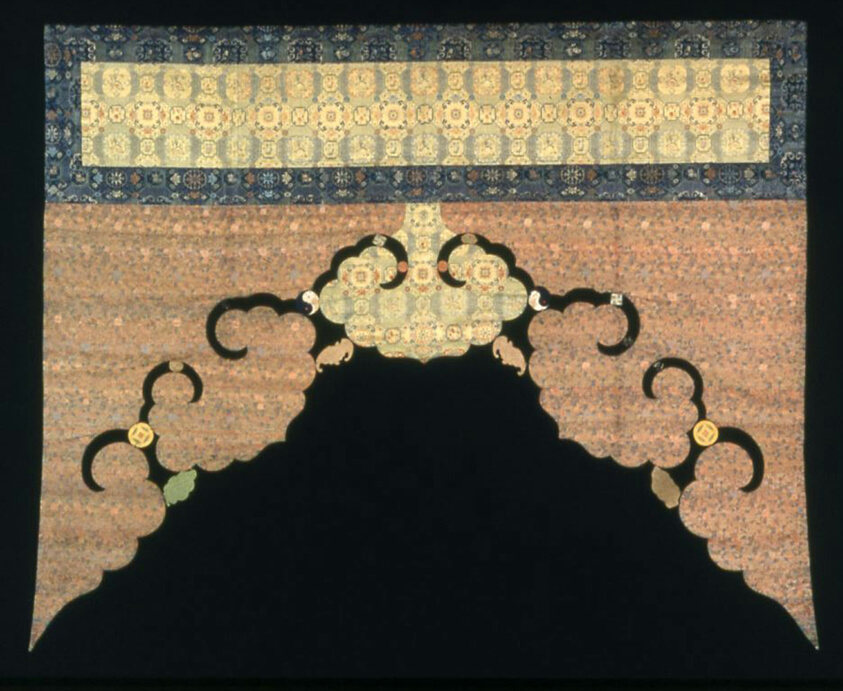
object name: Textile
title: Valance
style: qing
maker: China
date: Qing dynasty (1644–1911), 1750/1850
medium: Silk and gold-leaf-over-lacquered-paper strips, warp-float faced 4:1 satin weave with weft-float faced 1:2 'S' twill interlacings of secondary binding warps, supplementary patterning wefts and self-patterning ground wefts; silk, warp-float faced 5:1 satin weave with weft-float faced 1:2 'S' twill interlacings of secondary binding warps, supplementary patterning wefts and self-patterning ground wefts; silk, warp-float faced 5:1 satin weave with weft-float faced 1:2 'S' twill interlacings of secondary binding warps and supplementary patterning wefts; silk, warp-float faced 5:1 satin weave with secondary binding warps; appliquéd with warp-float faced 5:1 satin weave and warp-float faced 7:1 satin weave over paper; silk and gold-leaf-over-lacquered-paper strips, warp-float faced 4:1 satin weave with supplementary patterning wefts; silk, warp-float faced 5:1 satin weave; appliquéd with silk, warp-float faced 7:1 satin weave; silk, warp-float faced 4:1 satin weave; appliquéd with warp-float faced 4:1 satin weave; silk, warp-float faced satin weave with 1:2 'Z' twill interlacings of secondary binding warps and supplementary patterning wefts and self-patterning ground wefts; silk, warp-float faced 5:1 satin weave; appliquéd with warp-float faced 2:2 'Z' twill weave; silk, weft-float faced 1:2 'Z' twill weave; silk, warp-float faced 5:1 satin weave with secondary binding warps; lined with silk, plain weave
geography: China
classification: weaving; textile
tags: geometric motif, bats, foliage